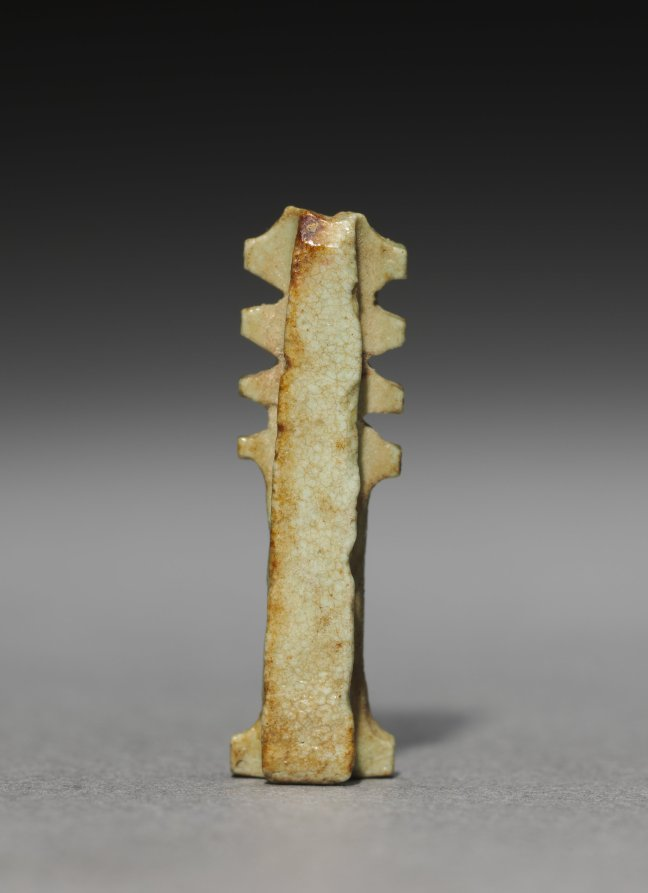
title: Pair of Djed-Pillar Amulets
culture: Egypt, Late period (715–332 BCE), Dynasty 30–Greco-Roman period (332 BCE–395 CE), Ptolemaic dynasty (305–30 BCE)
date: 380–30 BCE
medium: gray-green faience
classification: Amulets